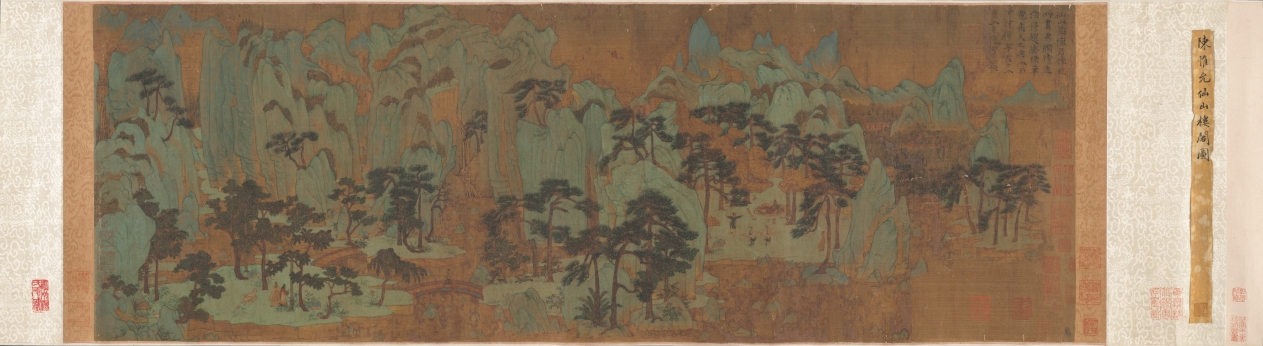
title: Mountains of the Immortals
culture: China, Yuan dynasty (1271-1368)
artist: Chen Ruyan (Chinese, c. 1331–1371)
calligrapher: Ni Zan (Chinese, 1301–1374)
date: 1300–1370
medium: Handscroll; ink and color on silk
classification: Painting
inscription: 1 inscription, 3 colophons, and 37 seals: 1 inscription, dated 1371, by Ni Zan 倪瓚 (1301-1374); 17 seals of Xiang Yuanbian 項元汴 (1525-1590); 4 seals of Chu Chih-ch'ih (late Ming Dynasty); 1 seal of Liang Qingbiao 梁淸標 (1620-1691); 1 seal of Gao Shiqi 高士奇 (1645-1704); 4 seals of Lu Xinyuan 陸心源 (1834-1894); 1 colophon, dated 1908, and 5 seals of Jing Xian 景贒; 1 colophon, dated 1915, by Lung Yu; 1 colophon, dated 1932, and 2 seals of Wu Mei; 3 seals unidentified.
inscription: 仙山圖， 陳君惟允所畫。 秀潤清遠， 深得趙榮祿筆意。 其人已矣， 今不可復得。 辛亥十二月二日倪瓚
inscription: Colophon by Jing Xian 景贒: The preceding Land of Immortals is an authentic work of the Yuan master, Chen Weiyun 陳惟允. According to the Yu yi bian 寓意編 by Du Mu 都穆of the Ming Dynasty, the painting was seen at the home of Chen Mengxian 陳孟賢 [c. 1500], a hermit. It is also recorded in Yu yi lu 寓意錄 of the present [Qing] era. The dimensions and the seals are all correct. When the painting went into the possession of Liang Qingbiao 梁淸標, the silk was already quite dilapidated. The only thing now missing, however, is the one line of writing by Xiang Zijing 項子京 [Xiang Yuanbian 項元汴] who records the original price he paid, being fifteen taels of silver. This must have been cut off by the dealer, which nevertheless did no harm to a masterpiece such as this. Jing Xian recorded this in the second month of the maoshen year [1908].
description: The landscape in deep green tones offers a view into a secluded mountain valley, populated by ancient figures surrounded by deer and cranes, all under high pine trees. A red-robed immortal in the air steers his crane toward the paradise land. This idyllic scene was presumably created amid the tumultuous transition from the Yuan to the Ming dynasty. Chen from Suzhou supported major rebel leaders, first Zhang Shicheng (1321–1367) with his base in Suzhou and then his rival Zhu Yuanzhang in Nanjing, after the latter had established the Ming dynasty. Chen was executed in 1371.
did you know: Such blue and green landscapes often evoke nostalgia for the idealized ancient times.